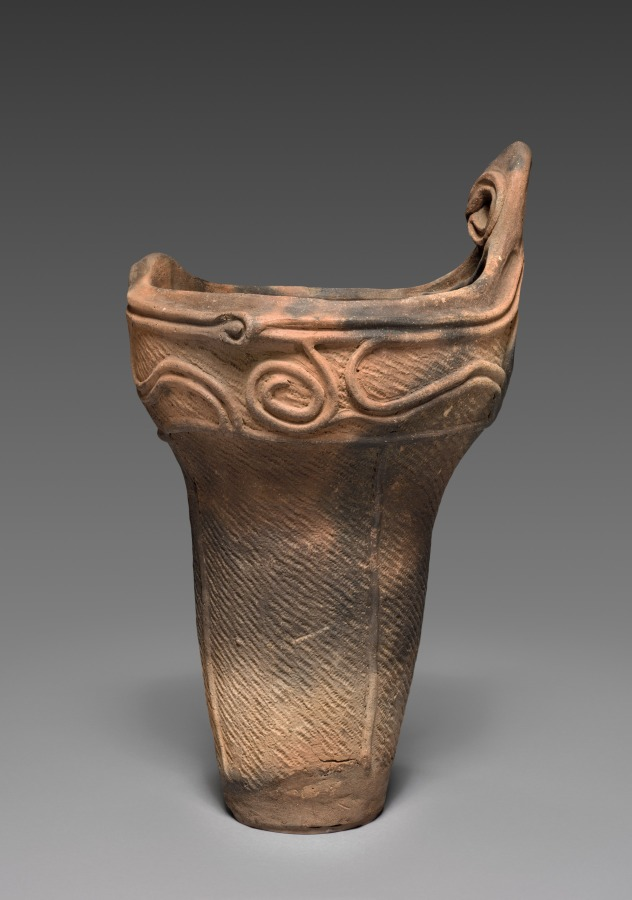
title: Cooking Vessel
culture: Japan, Jōmon period (c. 10,500–300 BCE)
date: c. 2500 BCE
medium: earthenware with impressed and applied designs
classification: Ceramic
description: This asymmetrical vessel has designs made by pressing cord or rope onto the damp clay and cylinders of clay applied to the surface. Based on its designs and shape, it was likely produced in the northern Kanto region. For reasons unknown today, different regions created signature styles.